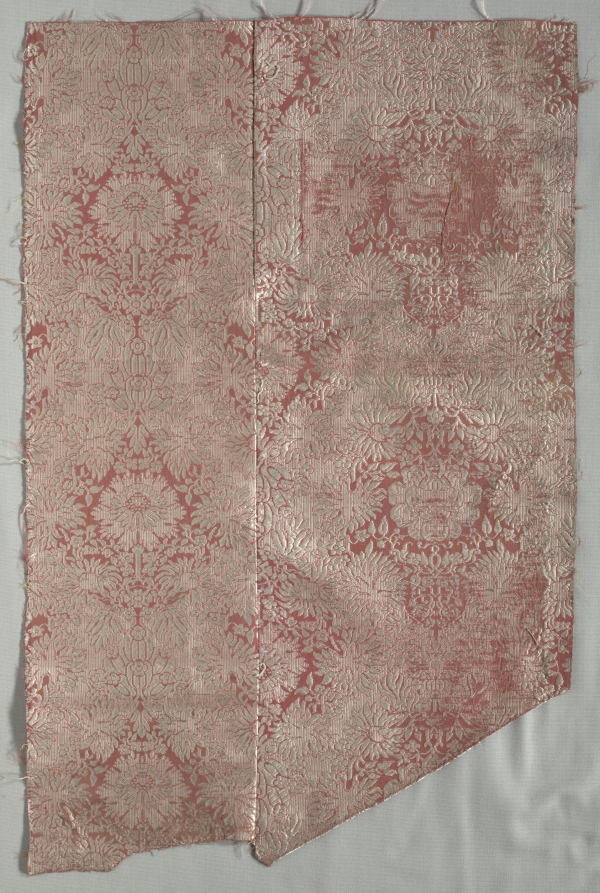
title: Silk Textile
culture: Italy, late 17th century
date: late 1600s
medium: plain compound cloth; silk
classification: Textile